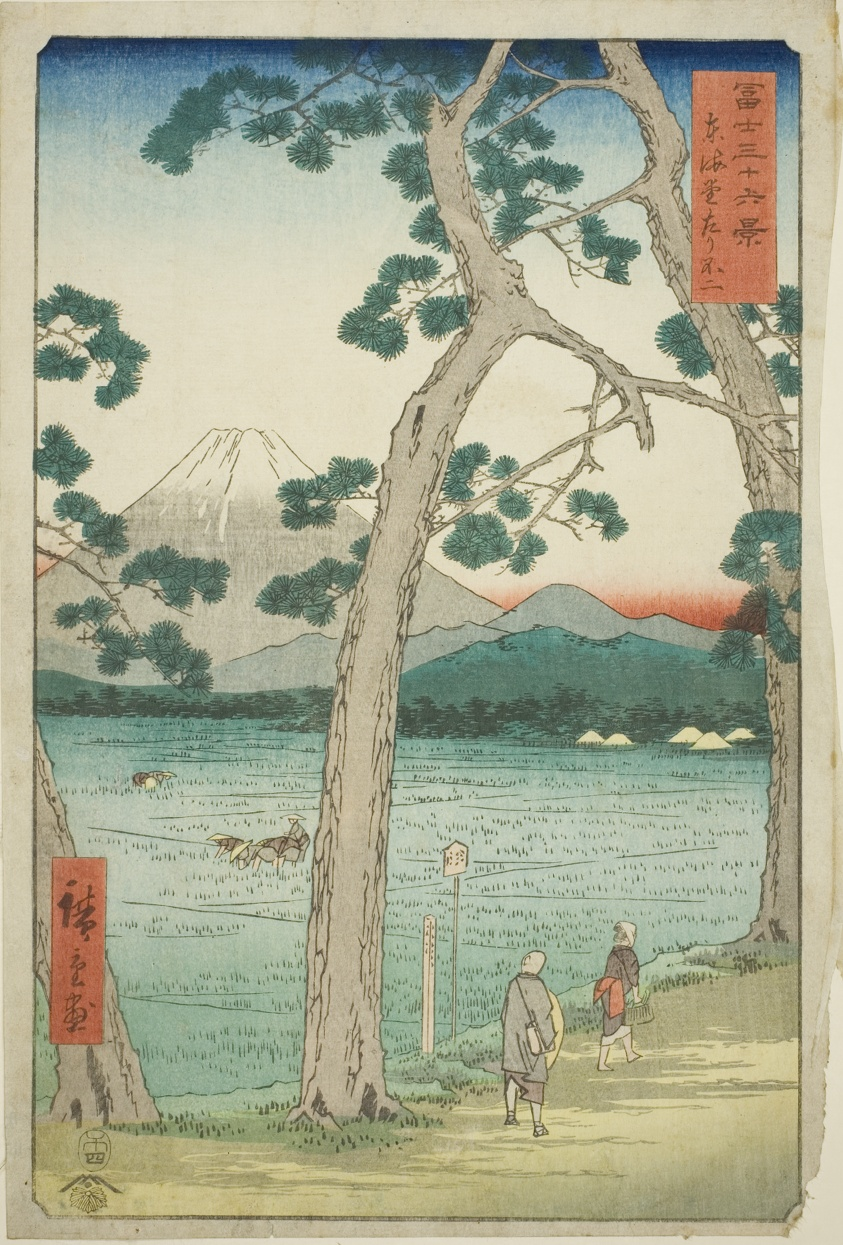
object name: Print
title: Mout Fuji Seen from the Left on the Tokaido (Tokaido hidari Fuji), from the series "Thirty-six Views of Mount Fuji (Fuji sanjurokkei)"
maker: Utagawa Hiroshige 歌川 広重; Japanese, 1797-1858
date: 1858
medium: Color woodblock print; oban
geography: Japan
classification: woodblock print; print; asian art